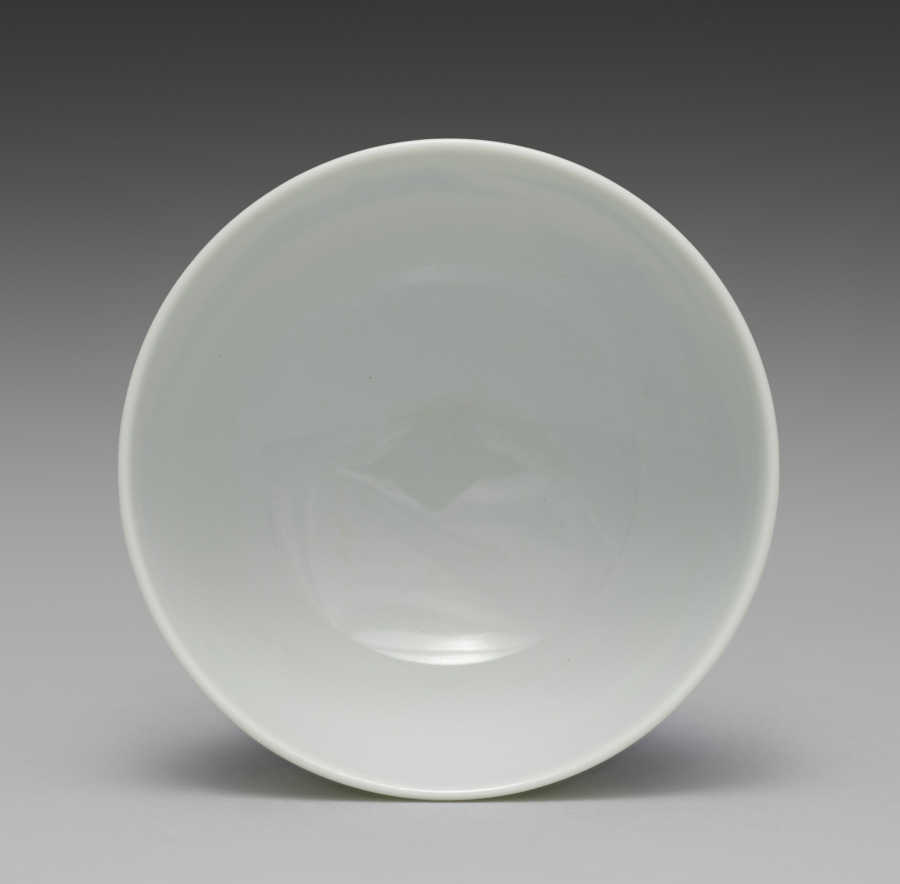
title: Teacup from Tea Set with Chinese Landscape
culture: Japan, Meiji period (1868–1912)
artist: Seifū Yohei III (Japanese, 1851–1914)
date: 1893–1914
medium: Porcelain with underglaze blue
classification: Ceramic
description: The theme of this sencha tea set is the Chinese scholar-recluse in an idyllic landscape. Each of the five teacups has a landscape with an architectural structure and some human activity. This tea set has a side-handled pot called a kyūsu, used for steeping, straining, and serving tea. Unlike some others, this set also has a yuzamashi, a container used to cool boiled water to just the right temperature for the best flavor when steeping. Seifū Yohei III’s painting teacher, Tanomura Chokunyū (1814–1907), made a visual record of famous sencha events that shows how these kinds of porcelains fit with objects such as a stove and kettle to form a complete set of utensils for tea preparation, and with ensembles of decorative objects meant to inspire creativity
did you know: This cup shows a man rowing a little skiff, which disturbs the otherwise still water. Behind him in the distance is an open-air pavilion. He is making his way toward a pair of figures playing a board game, much like the scene on the teapot. Down the hill from them is a residence; beyond this, a flock of geese approaches through the sky.